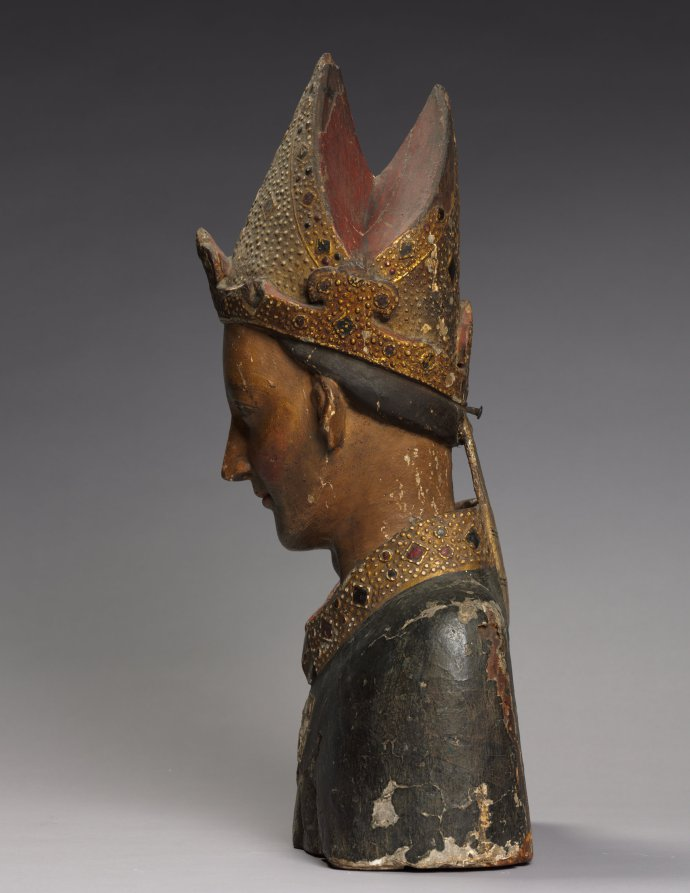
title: Bust Reliquary of St. Louis, Bishop of Toulouse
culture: Italy, Tuscany, Siena(?)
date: late 1300s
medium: wood (walnut) with polychromy, gesso and gilding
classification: Sculpture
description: This reliquary bust was probably made to house a relic of Saint Louis, Bishop of Toulouse (1274–97), second son of Charles II of Anjou, King of Naples (1288–1309). Renowned for his works of charity, he was made bishop in 1297 and died shortly after at the age of 23. He was canonized in 1317, and his cult of veneration spread rapidly in Italy and Spain. In art, Louis is generally represented as a "boy" bishop without a beard and with youthful features. The relic (now lost) would have been enshrined within. On feast days the reliquary would have likely been carried in procession and otherwise placed in a church sanctuary or on a side altar for the veneration of the faithful. Relics were the physical remains of the saints, chiefly their bodies. The living venerated the relics of the saints in order to seek their patronage, which in turn provided a proximate link to the divine ruler. The power of the saints was therefore manifested by and through their relics, or objects that were owned or touched by them. Medieval pilgrims, in a world fraught with peril, sought close physical contact with relics, which protected both the spiritual and temporal welfare of laypeople and religious communities.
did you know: This small bust was hewn out of wood, but painted realistically. Its life-like accuracy gave the medieval worshipper the sense that they were in the presence of the beloved bishop Saint Toulouse.